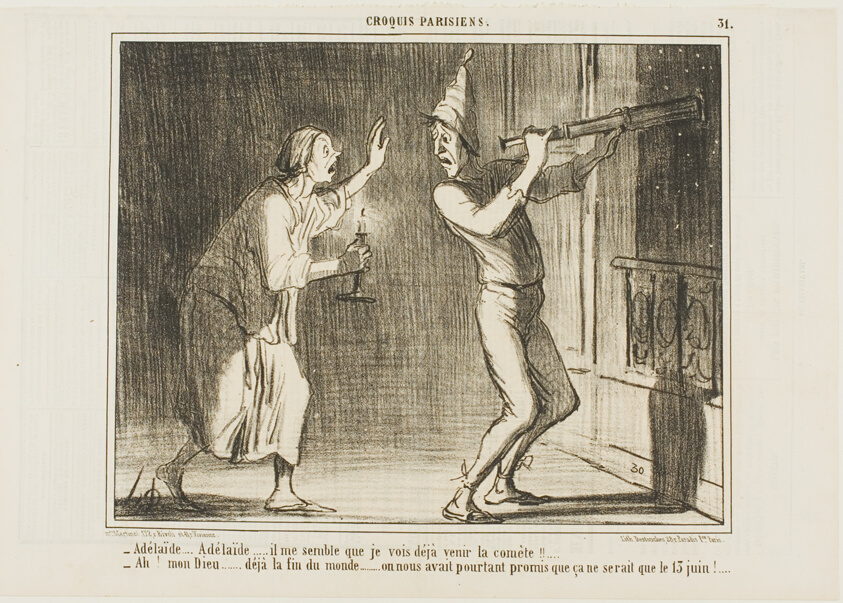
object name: Print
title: “- Adelaide, Adelaide.. I think I can see the comet coming!!... - Oh my God... this is the end of the world.... how annoying. They promised it wouldn't come until June 13!,” plate 31 from Croquis Parisiens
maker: Honoré Victorin Daumier; French, 1808-1879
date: February 18, 1857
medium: Lithograph in black on ivory wove paper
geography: France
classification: lithograph; print; prints and drawing